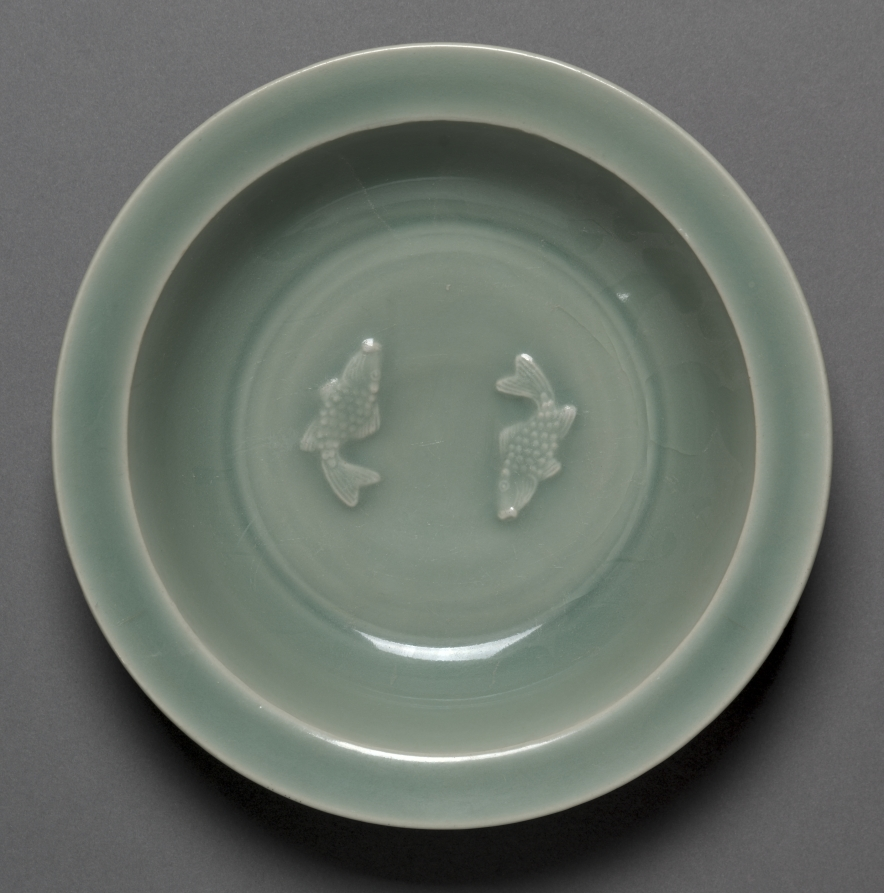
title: Dish with Two Fish in Relief: Longquan Ware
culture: China, Zhejiang province, Southern Song dynasty (1127-1279)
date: mid-1200s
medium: glazed porcelain with molded decoration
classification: Ceramic